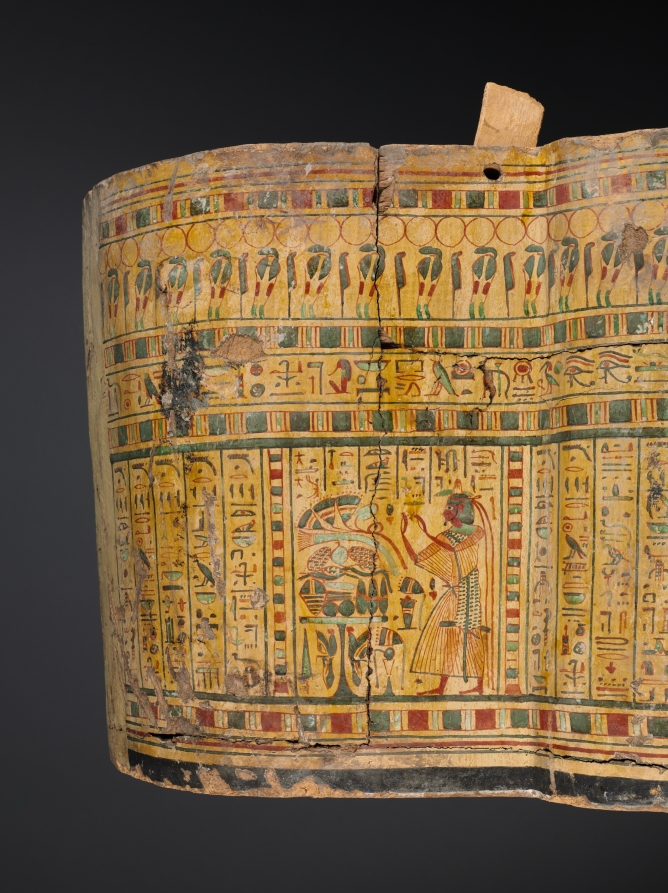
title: Coffin of Nesykhonsu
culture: Egypt, Thebes, Third Intermediate (1069–715 BCE), Dynasties 21–22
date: c. 976–889 BCE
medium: gessoed and painted sycamore fig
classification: Funerary Equipment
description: Egyptian coffins told stories and illustrated spells to help the deceased transition safely to the afterlife. Inside Nesykhonsu's coffin there are two jackals, one facing right and the other left, near the top. Here, the jackal represents the powerful deity Anubis, the god of the afterlife and embalming.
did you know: Two of Nesykhonsu's titles, "Lady of the House" and "Singer of the Choir of Mut the Great," are written on the outside of the coffin.